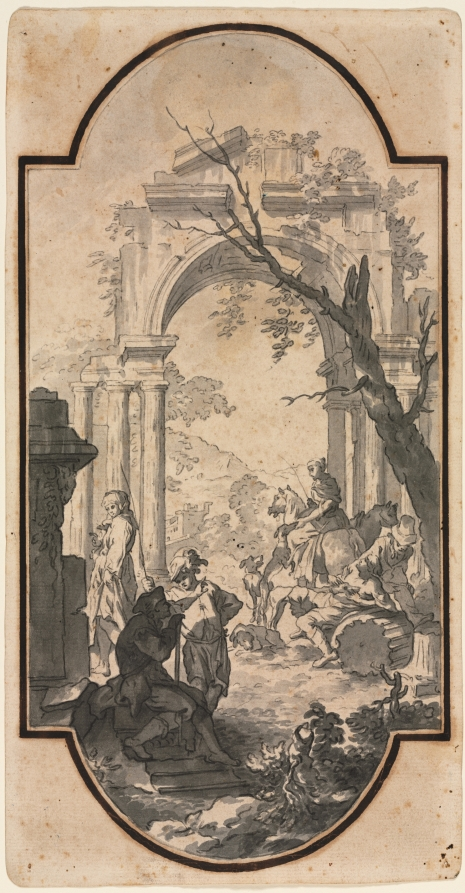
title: Triumphal Arch and Figures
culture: Italy, 18th century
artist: Andrea Locatelli (Italian, 1695–1741)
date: first half 1700s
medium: brush and gray and black wash, over black chalk; framing lines in black chalk, and brown ink (iron gall)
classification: Drawing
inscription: VERSO, lower left, in graphite: [6?] [upside down] ; lower right, in graphite: A